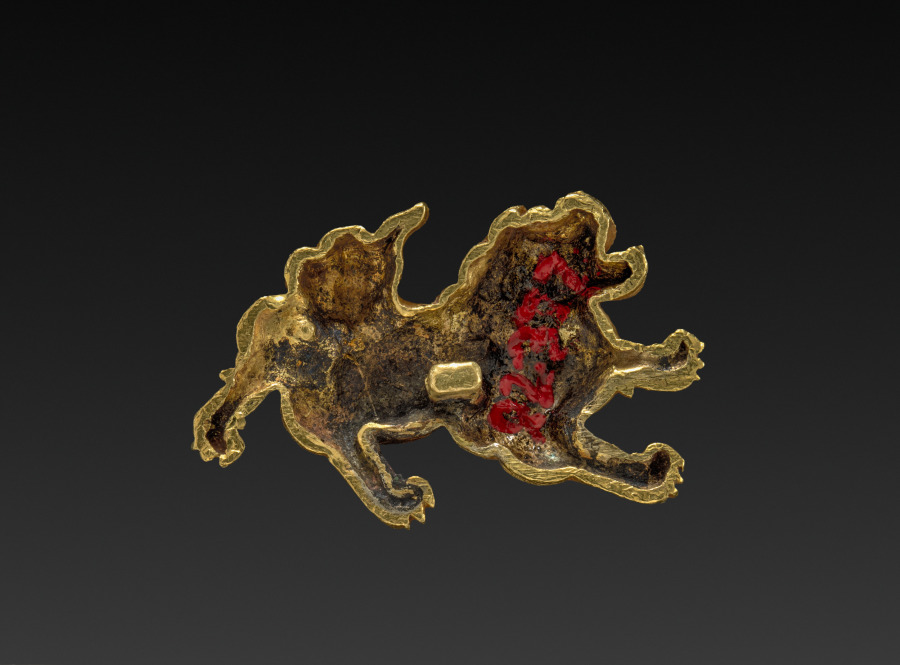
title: Lion-shaped Sword-Grip Ornament (Menuki)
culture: Japan, possibly Edo period (1615-1868)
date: c. 1615–1868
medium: gilt bronze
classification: Metalwork